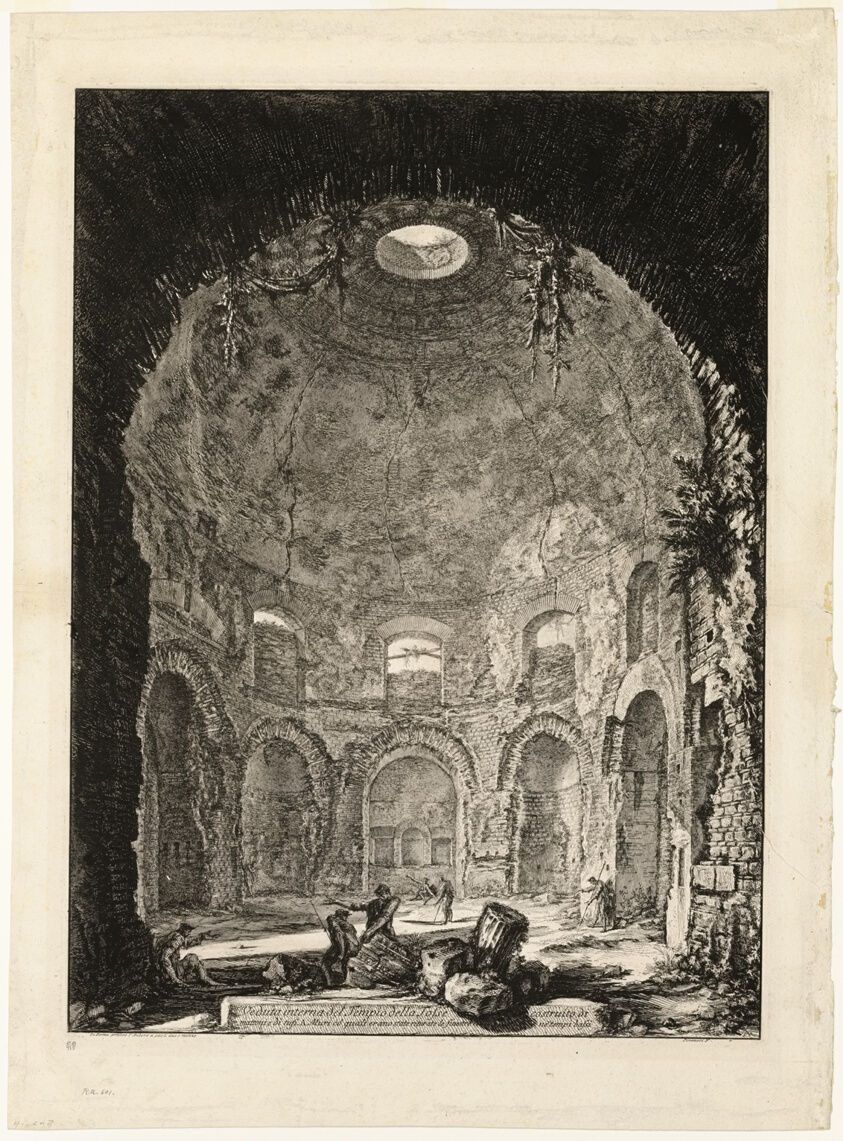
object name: Print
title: Interior view of the so-called Tempio della Tosse [Temple of the Cough], from Views of Rome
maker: Giovanni Battista Piranesi (Italian, 1720-1778)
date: 1764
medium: Etching on heavy ivory laid paper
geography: Italy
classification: etching; print; prints and drawing